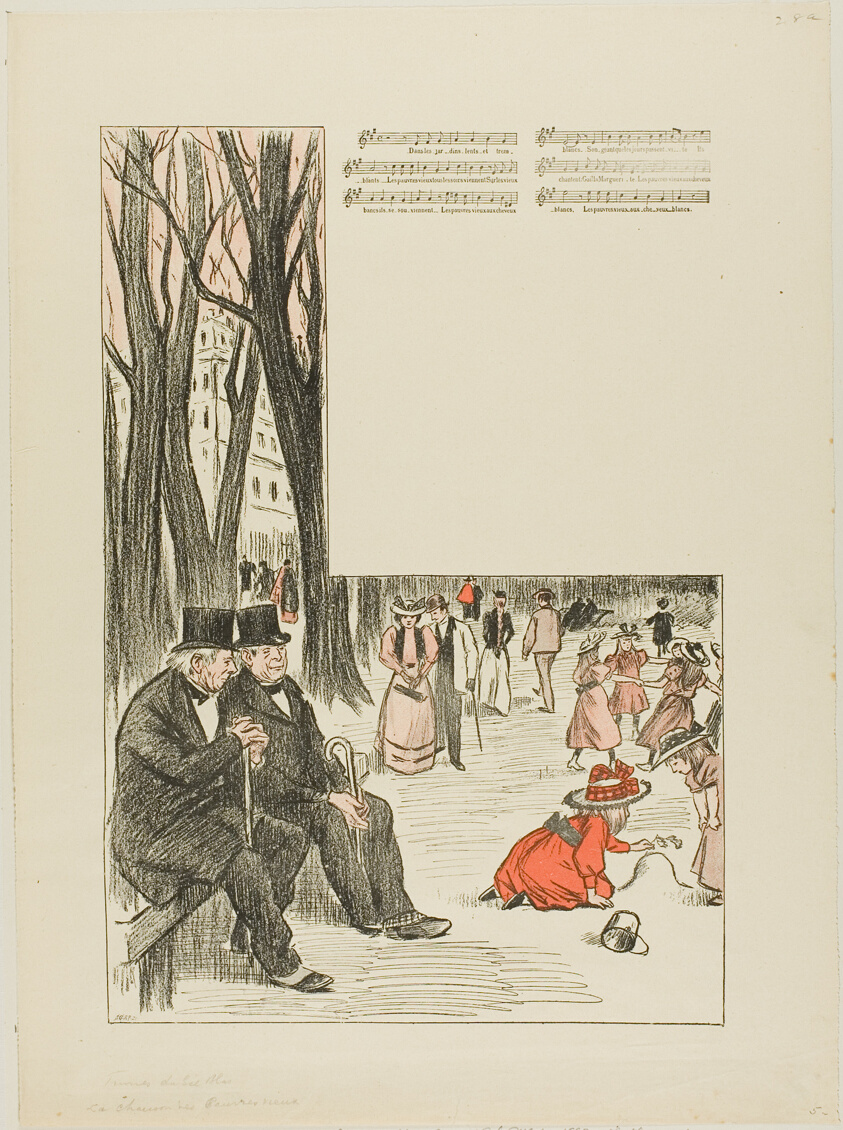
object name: Print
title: Song of the Poor Old Men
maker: Théophile-Alexandre Steinlen; French, born Switzerland, 1859-1923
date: published November 3, 1893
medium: Photorelief print in red and black with letterpress music/lyrics on cream wove paper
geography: France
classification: photorelief; print; prints and drawing